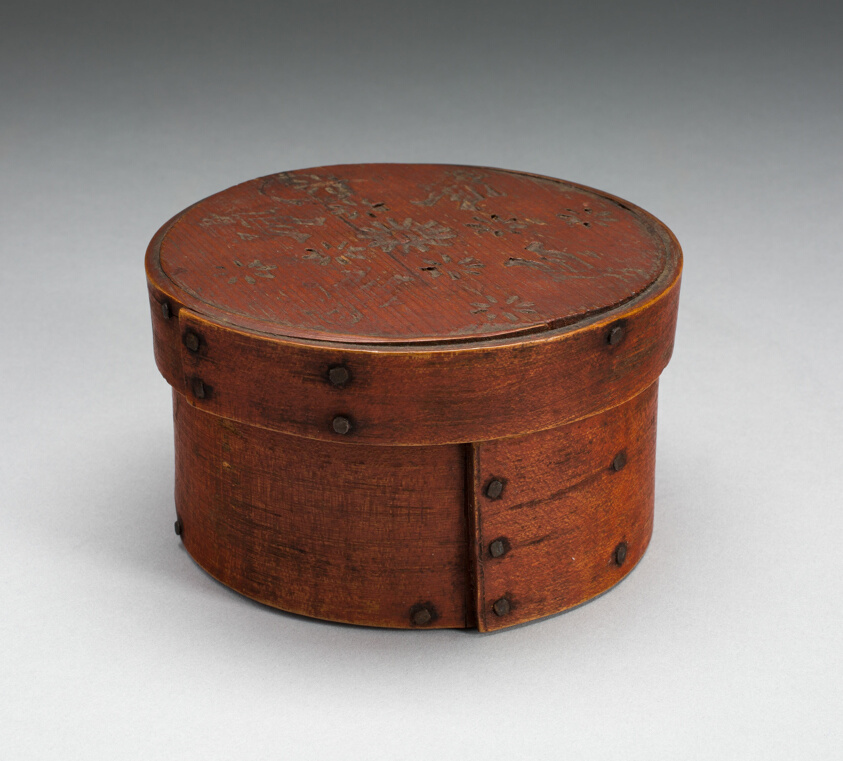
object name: Decorative Arts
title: Box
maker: Artist unknown (American, 19th century)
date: 1830–70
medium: White pine and chestnut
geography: United States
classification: case furniture; box; furniture; american decorative arts; american arts; decorative arts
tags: furniture